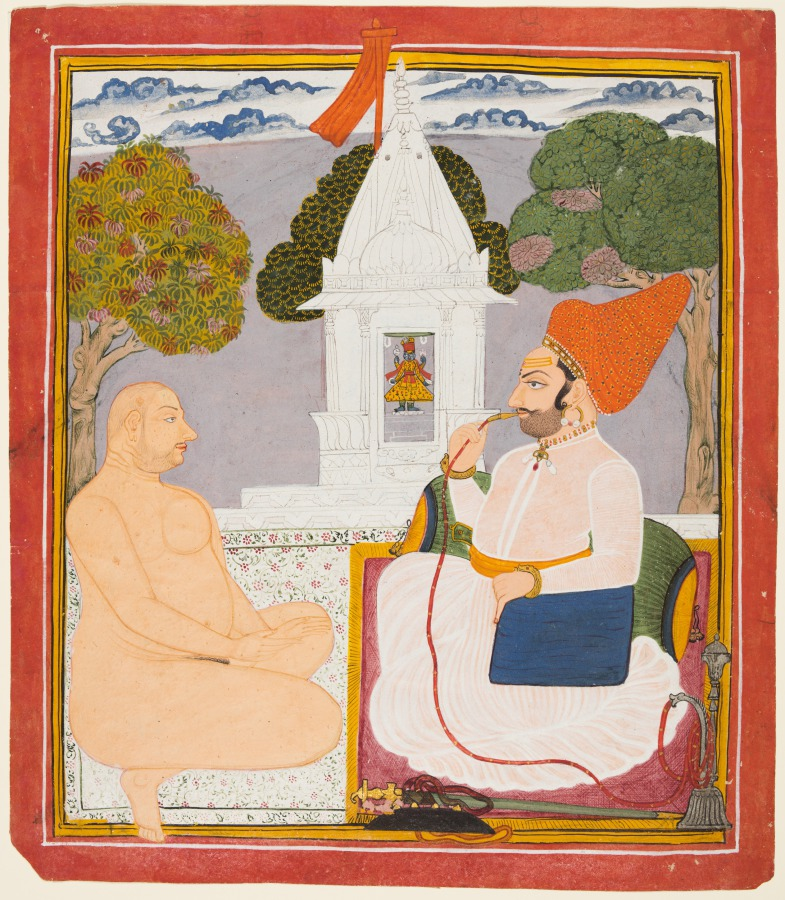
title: A Rathor Noble Visiting a Holy Man at a Vishnu Shrine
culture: Northwestern India, Rajasthan, Marwar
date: c. 1760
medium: gum tempera and gold on paper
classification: Painting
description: A naked Jain monk sits before a Rajput noble, whose triple mark on the brow indicate that he is a follower of the Hindu god Shiva. Behind them is a temple dedicated to Vishnu. In a visual statement of ecumenism, all three religions appear to coexist peacefully in the kingdom. The noble has set down his sword and shield and enjoys a hookah while listening to the discourse of the monk.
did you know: Monks belonging to the Digambara (Sky-clad) sect of Jainism renounce the comforts of clothing.